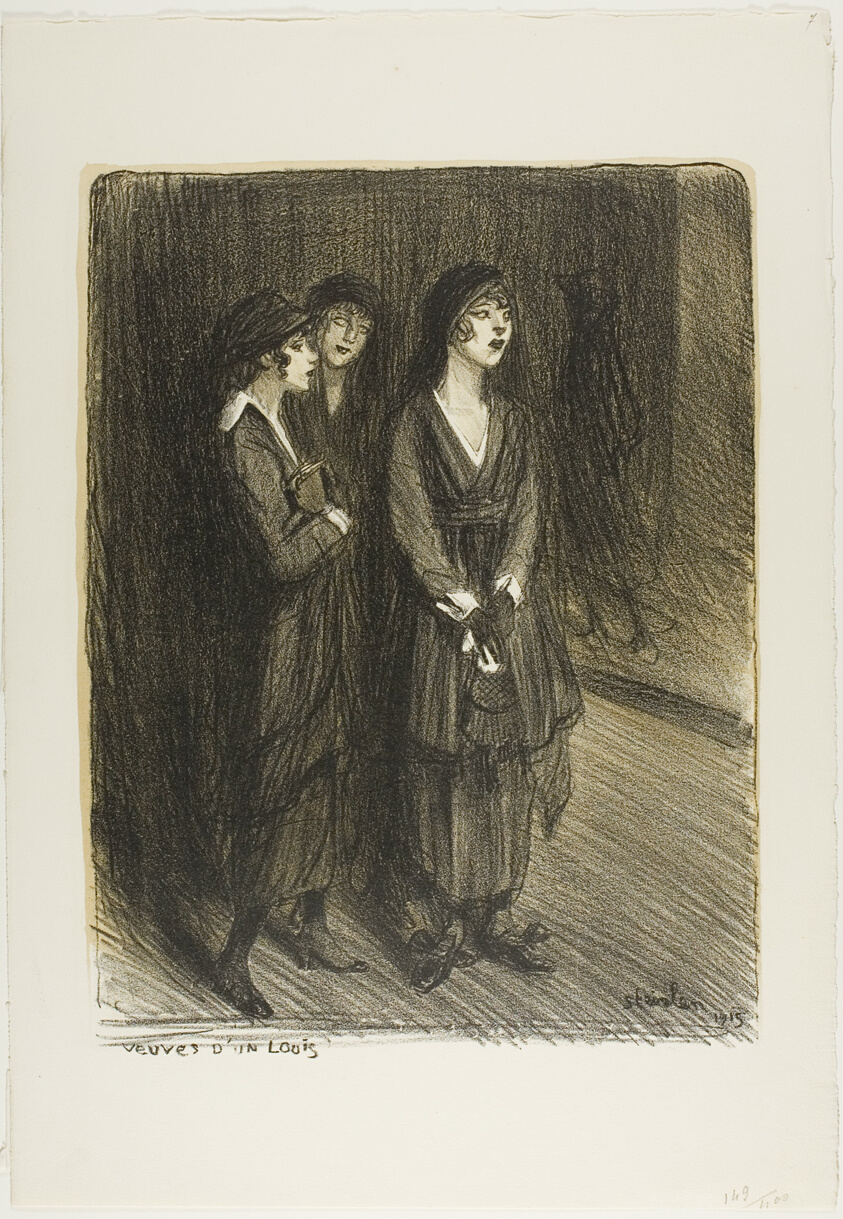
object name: Print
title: Veuves d'un Louis, plate seven from Actualités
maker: Théophile-Alexandre Steinlen; French, born Switzerland, 1859-1923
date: 1915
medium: Lithograph in black over a fawn tint with scraping on stone on ivory wove paper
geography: France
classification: lithograph; print; prints and drawing